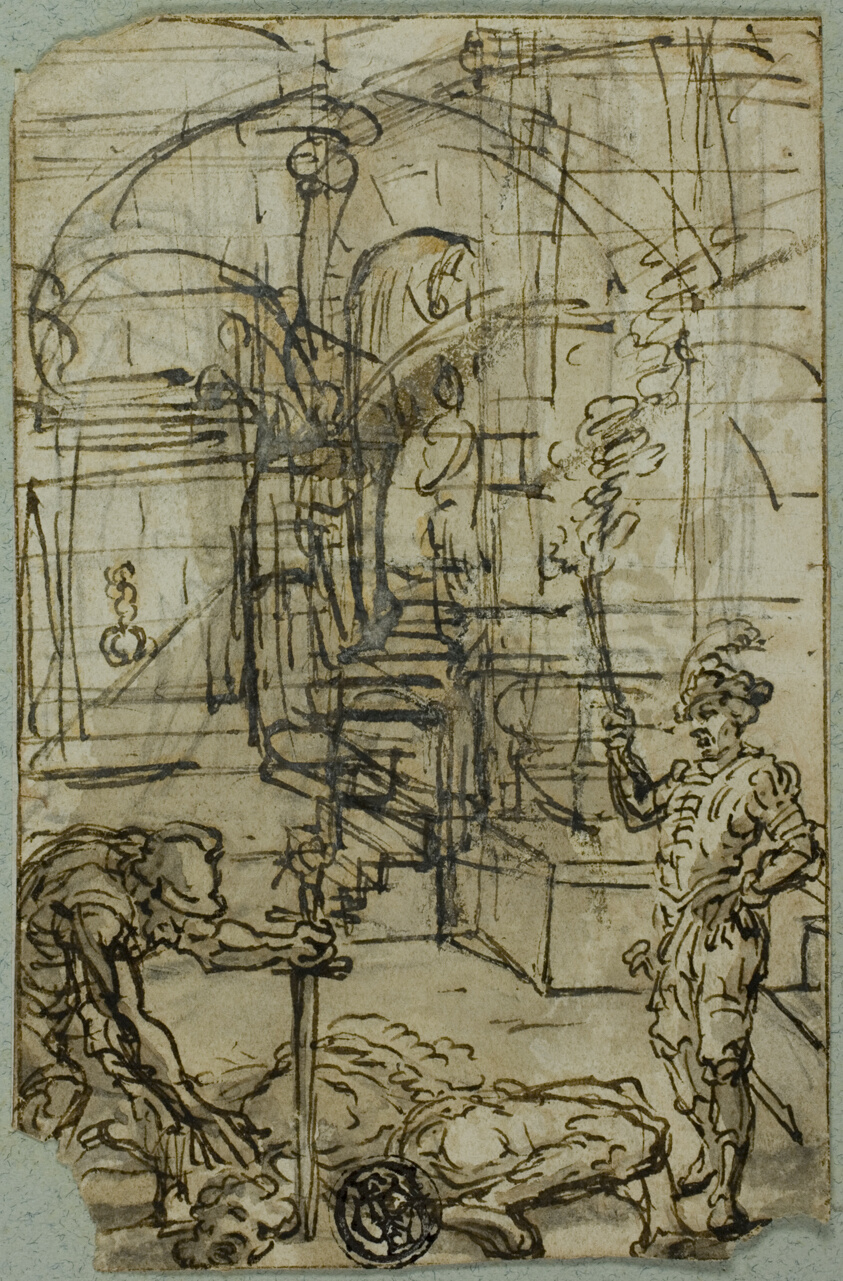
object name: Drawing and Watercolor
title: Beheading of Saint John the Baptist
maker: Style of Salvator Rosa (Italian, 1615-1673)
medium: Pen and brown ink with brush and brown wash, over black chalk, on ivory laid paper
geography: Italy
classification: pen and ink drawings; drawings (visual works); prints and drawing